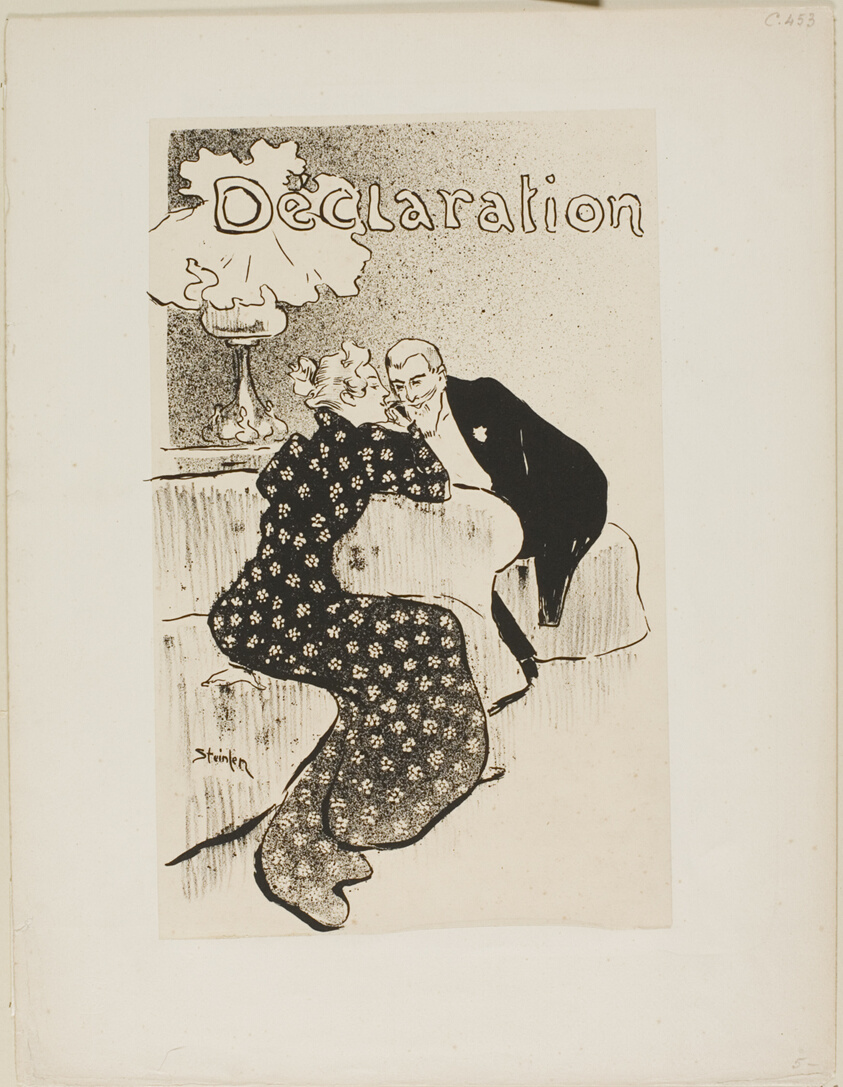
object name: Print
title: The Declaration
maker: Théophile-Alexandre Steinlen; French, born Switzerland, 1859-1923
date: 1894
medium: Lithograph in black on cream chine laid down on ivory wove paper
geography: France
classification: lithograph; print; prints and drawing